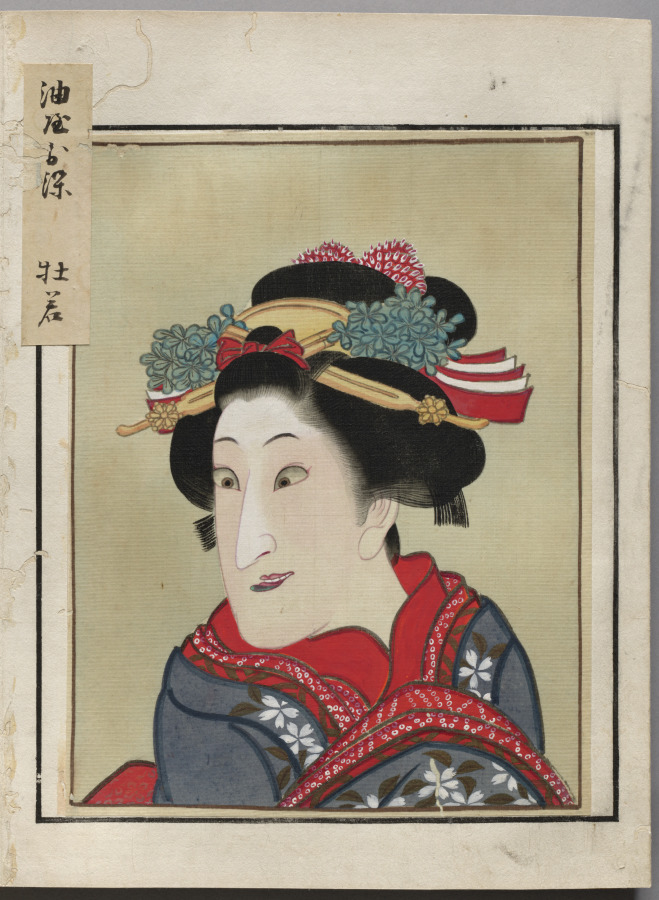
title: Double-Leaf from Album of Actor Portraits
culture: Japan, Edo period (1615–1868)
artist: Shōrakusai (Japanese)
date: c. 1790–1810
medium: double-leaf from an accordion-style album; ink and color on silk (right) and ink on paper (left)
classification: Bound Volume